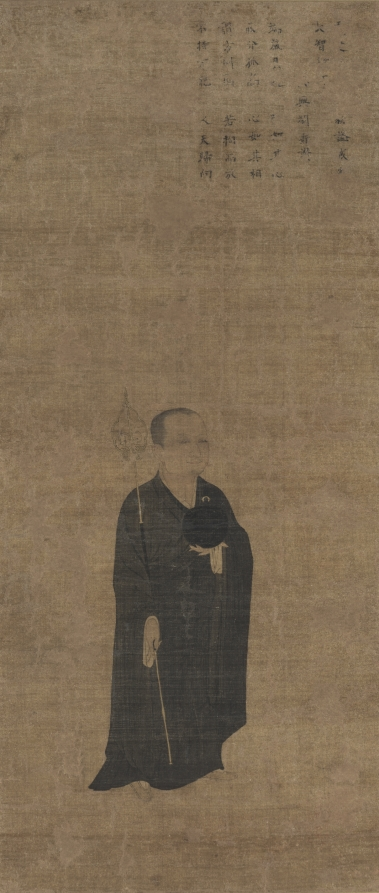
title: Portrait of Priest Dazhi (1048–1116), Master of Law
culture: China, Southern Song dynasty (1127-1279)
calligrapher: Liu Tao (Chinese, late 1000s–early 1100s)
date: 1100s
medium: Hanging scroll; ink and light color on silk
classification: Painting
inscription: Inscription by Liu Tao (late 1000s–early 1100s): Dignified with the perfection of the upasampada,/ His appearance is like his mind;/ Uncompromising and loftily aloof,/ His mind is like his appearance./ To say he is square, he proves to be round;/ He looks timid, yet his spirit is unbound./ Having no attachment, and holding no reins,/ Man and deities alike take refuge in him. (Translation by WKH, 1980)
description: Monk Yuanzhao, with the honorific title Dazhi Lüshi, Great Wisdom Master of Vinaya, is depicted here as an itinerant monk, holding his alms bowl in the left and staff in the right. In 1142, Emperor Gaozong had bestowed Yuanzhao with a posthumous title, mentioned in the inscription, which suggests that the portrait was made after the master’s death. A master of the Lü sect of Buddhism, with a calm benevolent smile on his face, Yuanzhao was active on Mount Tiantai and in Hangzhou. Later, Liu Tao, a southerner from Changxing, added the inscription. The eulogy reads: Dignified he is, perfect in his upasampada [ordination of a monk]. His appearance is like his mind. Uncompromising and aloof. His mind is like his appearance. To say he is square, he proves to be round. He looks timid, yet his spirit is unbound. Having no attachment, and holding no reins, men and deities alike take refuge in him. —translated by Wai-Kam Ho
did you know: A native of Hangzhou, the priest Dazhi was known for his eloquent exposition of Buddhist doctrines and for his success in winning many converts.